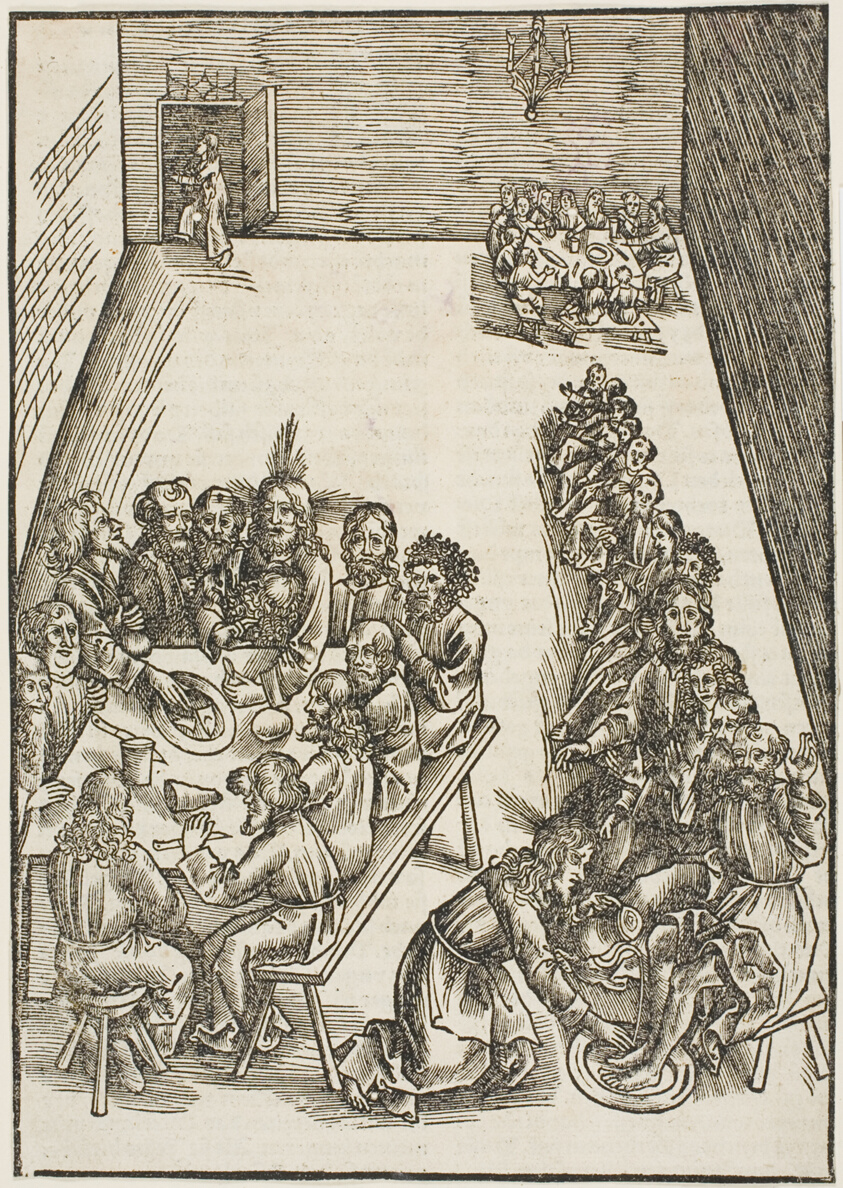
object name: Print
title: The Last Supper and Christ Washing the Feet of His Disciples, plate nine from Passio domini nostri Jesu Christi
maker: Urs Graf, the Elder (Swiss, 1485-1527/28); published by Johann Knobloch (German, born Switzerland, died 1528)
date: c. 1503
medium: Woodcut on ivory laid paper with letterpress on verso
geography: Switzerland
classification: woodcut; print; prints and drawing